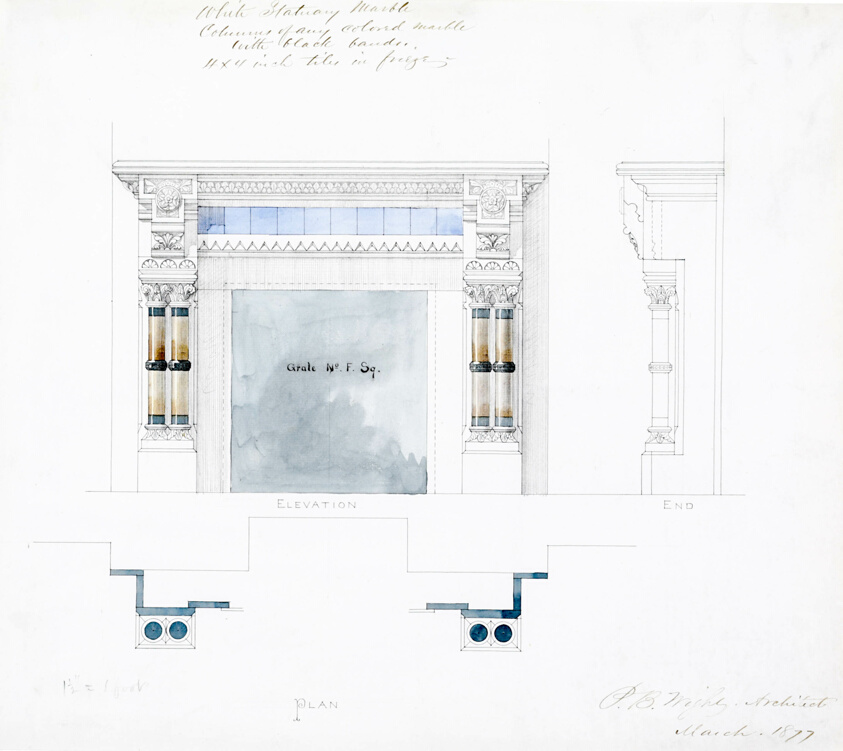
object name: Architectural Drawing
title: White Statuary Marble Mantel Design, Elevations and Plan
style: 19th century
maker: Peter Bonnett Wight (American, 1838–1925)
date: 1877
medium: Ink and watercolor on paper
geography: United States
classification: architectural drawing; design drawing; architecture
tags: mantles, plan, design, drawing, elevation, architecture